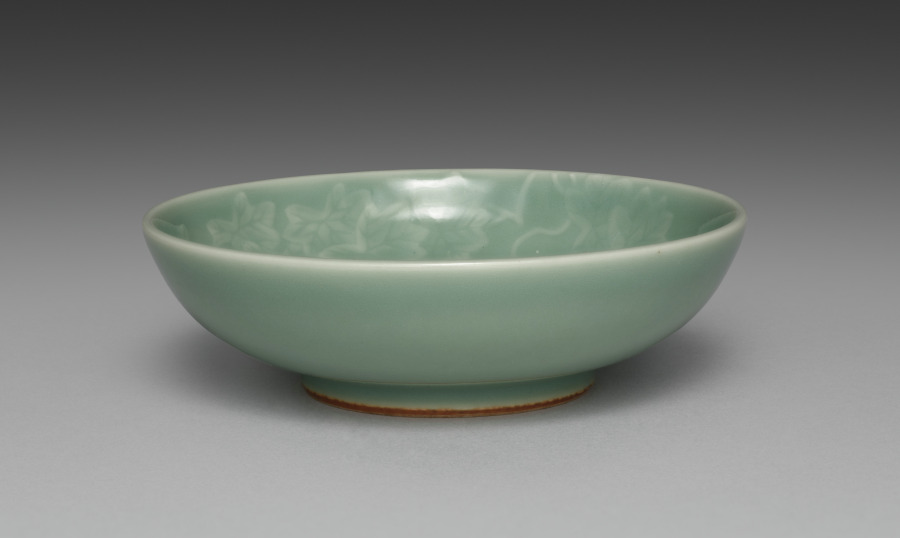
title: Dish from Dishes with Ivy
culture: Japan, Meiji period (1868–1912)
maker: Seifū Yohei III (Japanese, 1851–1914)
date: 1893–1914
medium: One from a set of five dishes; porcelain with green glaze and molded designs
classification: Ceramic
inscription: 清風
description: Yohei III’s main output for his sophisticated clientele was in the form of tea sets and dining sets. He often produced in pairs, sets of five, or sets of ten. This set of five dishes with a green glaze and designs of ivy vines in very low relief has unfortunately lost its box. These dishes are slightly larger than the other dishes, like CMA 2022.187, and so may have been not saucers but rather small plates for meals.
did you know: In his career, Seifū Yohei III created a range of dishes in green glazes.